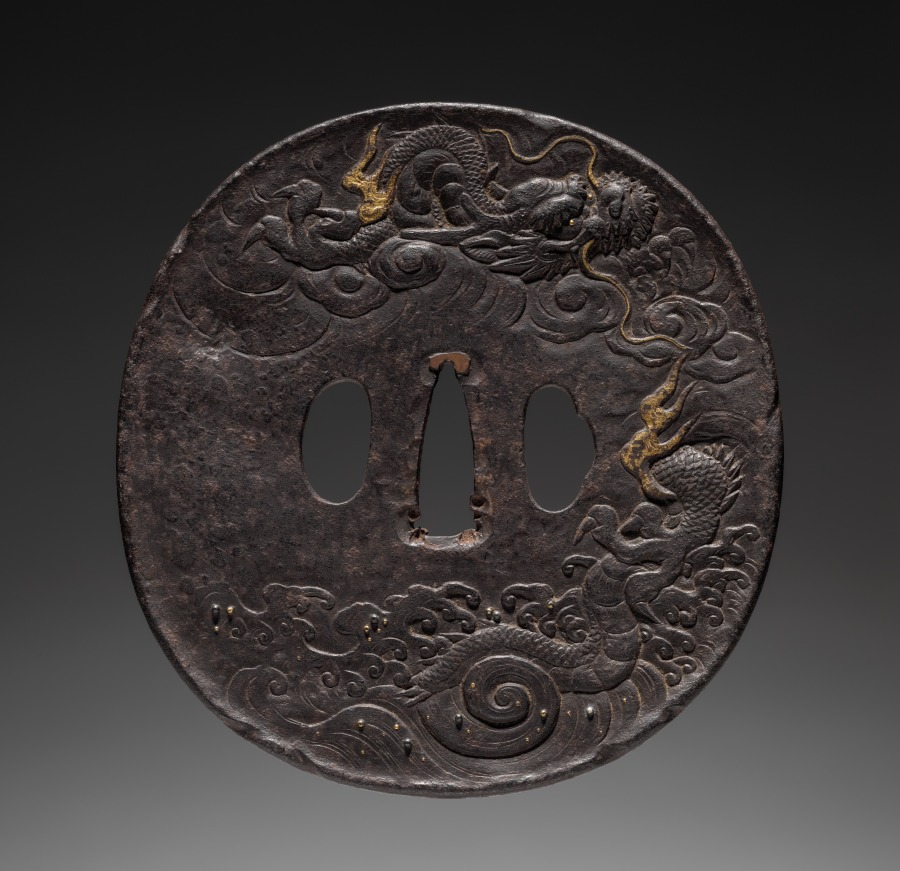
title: Sword Guard (Tsuba) with Dragon in Waves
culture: Japan, possibly Edo period (1615-1868)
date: c. 1615–1868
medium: iron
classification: Arms and Armor